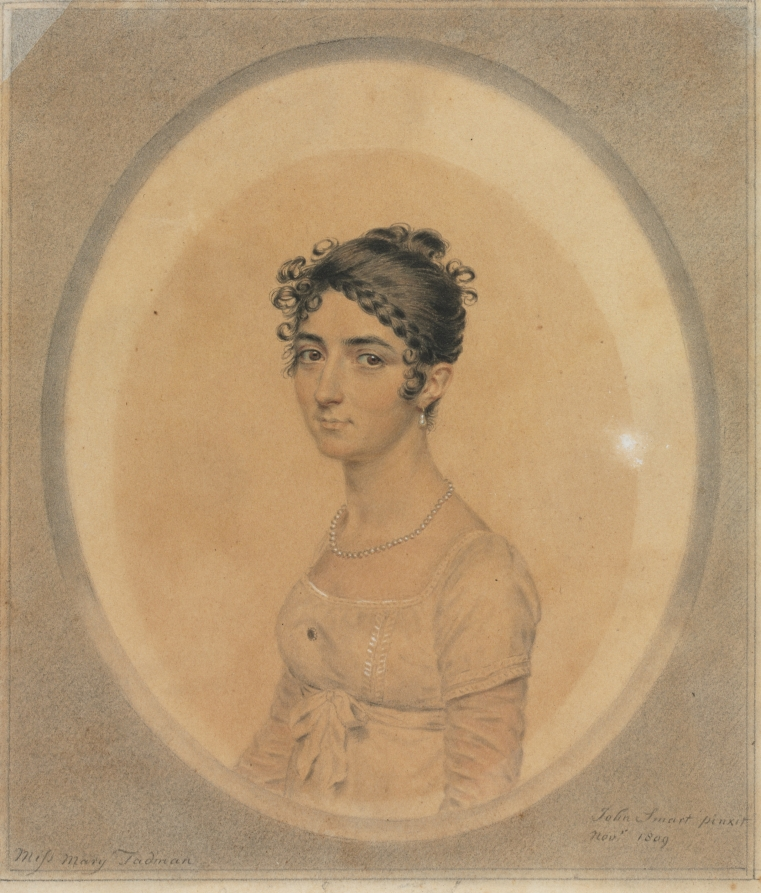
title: Portrait of Miss Mary Tadman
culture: England, 18th century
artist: John I Smart (British, 1741–1811)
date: 1809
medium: watercolor and graphite, heightened with traces of white gouache on paper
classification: Portrait Miniature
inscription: signed, lower right, in gray watercolor: John Smart pinxit / Novr. 1809 ; by artist, lower left, in gray watercolor: Miss Mary Tadman ; VERSO, upper left, in graphite: B/8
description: Mary Tadman’s head and shoulders face right. Her eyes are brown, and she wears a necklace of small pearls and a drop pearl earring. She wears her dark brown hair high in a classically inspired bun, with a braid across the hairline and many curls falling over her forehead and in front of her ears. Her white dress is delicately embroidered at the edges along the bust and is tied at the empire style waist, with a small pin fastened to the front. The translucent white sleeves worn beneath the dress are probably made of muslin and detachable, since they do not appear in the ivory version of the portrait. Detachable sleeves were popular during the late eighteenth and early nineteenth centuries and enabled a dress to function as day- and eveningwear. The nature of this work as a finished drawing rather than exclusively a preparatory sketch for a miniature on ivory is evident in the degree of finish of the sitter’s clothing, heightened with white gouache and painted to the elaborated penciled oval border. In December 1809, the year this drawing was executed, Mary Tadman (1786–1862) married Major William Jolliffe Eldridge. He died in 1818 in Poona, India, and three years later, his widow married Colonel Daniel Hutchins Bellasis (1785–1836), with whom she had two children: Flora and Augustus Fortunatus. Mary lived for nearly two decades in India, where she was a celebrated beauty, and where her second marriage into the militarily distinguished Bellasis family seems to have secured her presence in high society. On the occasion of her marriage in 1821, she wrote her spinster sister, “I forgot I have not told you a word of my marriage, which by the by was the grandest affair known in Bombay, I am almost tired of the subject—visits and congratulations, etc. The Governor and Staff went with me to Church . . . and all the people of any consequence in Bombay about 100 came to a Breakfast at Randall Lodge—since which it has been one constant scene of gaiety. Last week, pity me when I tell you, how I was obliged to exert myself—we gave a dinner party to 40 people. The Governor’s family . . . and all the Big Wigs who gave me parties—the same evening 160 came at ten to a dance—afterwards a supper very splendid I assure you.” A related ivory version of this miniature is in the Fitzwilliam Museum, Cambridge, signed and dated at the lower left: “J S / 1809.” While Miss Tadman’s coiffure, countenance, jewelry, and dress are identical to the Cleveland sketch, in this portrait she wears an elaborate black and red, flowered Indian shawl with white border over her white dress, the under-sleeves omitted. Indian shawls, particularly those from Kashmir, were extremely expensive signifiers of social status in India and Europe, and by the end of the eighteenth century, they often formed part of the trousseau of a wealthy French or English bride. The shawls were particularly fashionable worn in contrast with the high-waisted gauzy white dresses of the Empire period. While many portraits and miniatures from the early nineteenth century depict women conspicuously displaying their Indian shawls, Miss Tadman wears hers in a manner not often seen in European portraits: across one shoulder and around the waist, like a sari. Mary and William Eldridge wed in December 1809, one month after Smart signed this sketch. Because Smart depicted Miss Tadman during her engagement, the shawl worn in the finished ivory portrait may have been a gift from her betrothed, who had been stationed in Bombay in 1809. While appropriate for a half-length portrait, the under-sleeves were probably deemed unnecessary for the miniature, which shows little of the arm and instead depicts the sitter more formally, wrapped in her shawl. The existence of a larger, finished drawing as well as a miniature on ivory suggests that the finished drawing may have served a variety of roles, while also implying that another preparatory sketch for both may exist. At nearly twice the size of the ivory, Cleveland’s drawing is not likely to have been the sole preparatory exercise for the finished miniature. There is no question that as a young bride-to-be, Miss Tadman was thinking carefully about how she wished to be represented at a pivotal moment in her life, and that a single portrait was insufficient to accommodate all of the accoutrements that were of significance to her. The neo-Grec coiffure, au courant empire waist dress with detachable sleeves, pearl parure, ornamental pin, and costly shawl communicate clearly the social ambitions to which her biography is also a testament.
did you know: This drawing was passed on through the generations of the artist John Smart's family until 1937 when his great-granddaughter sold it.